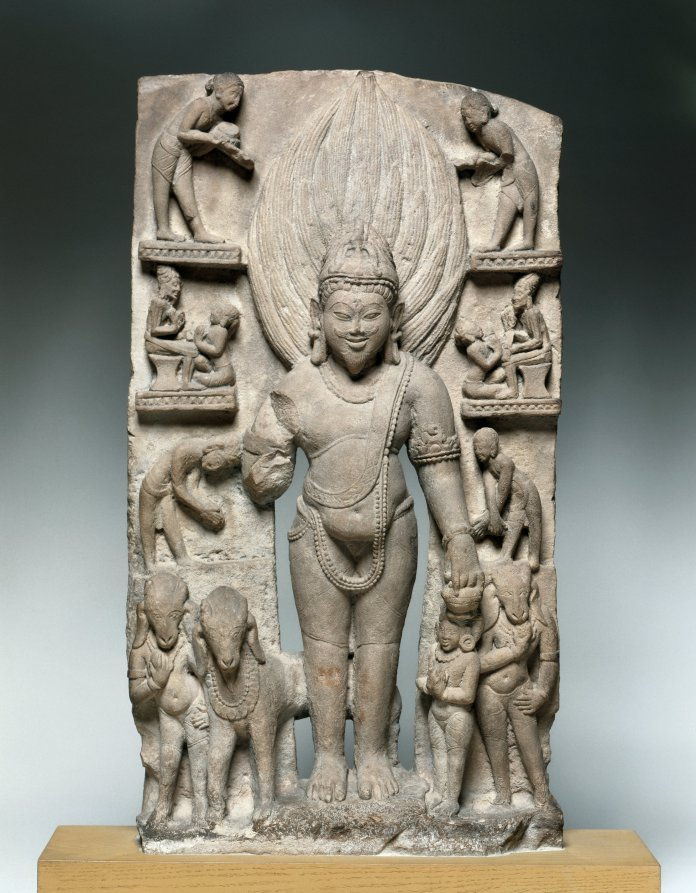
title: Agni, God of Fire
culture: India, Uttar Pradesh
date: c. 1000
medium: sandstone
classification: Sculpture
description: The Hindu god Agni, with flames rising behind him, is the figural form of the sacrificial fire, central to religious practice in India since the early second millennium BC. Agni’s mount is the goat, and together they preside over the Southeast. In the upper registers, Brahmans perform fire sacrifice, preach to disciples, and practice "hot yoga."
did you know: This sculpture is on the cover of the Penguin Classics edition of the Hindu "Laws of Manu."